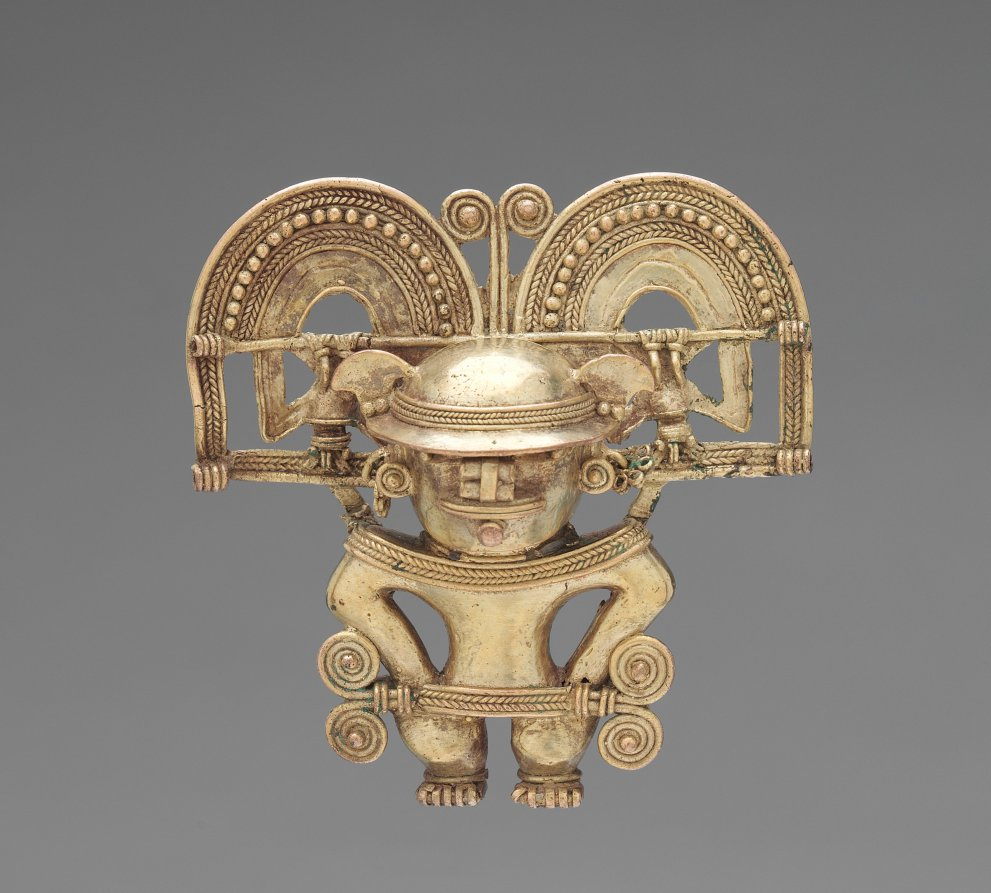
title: Figure Pendant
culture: Colombia, Tairona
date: 900–1550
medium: cast gold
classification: Metalwork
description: Tairona-style pendants are among the most spectacular of all ancient American gold ornaments, in part because of the detail achieved with lost-wax casting. The traits of the figure pendant include a lower lip ornament and a headdress in which two bats hang upside down. Although called caciques (chieftains)-that is, ruler portraits-the meaning of such figures is not well understood. Bird imagery was important in the isthmian region in ancient times and remains so today. For instance, among the modern Bribri of Costa Rica, the principal creator deity (Sibo) takes the form of a buzzard or kite who wears a collar. Collars are standard features of ancient bird pendants, like the one shown here.